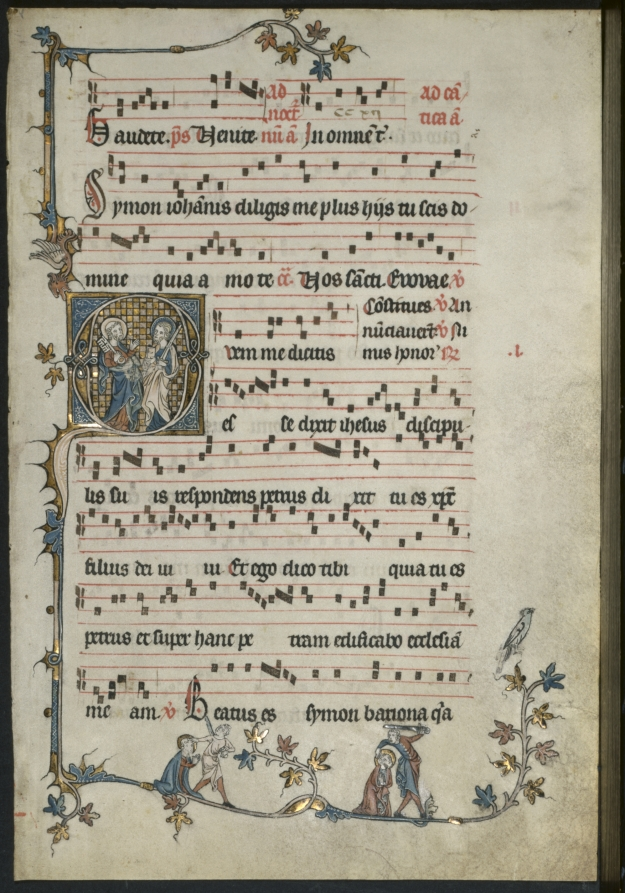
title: Leaf Excised from an Antiphonary: Initial Q with Saints Peter and Paul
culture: South Flanders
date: c. 1325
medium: ink, tempera and gold on vellum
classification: Manuscript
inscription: Quem me [esse] dicitis dixit Ihesus discipulis suis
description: The sheet belonged to an antiphonary, a large liturgical book used by the choir for chanting. It contains all the music and texts needed for daily services in the church. In South Flanders, where this manuscript originates, the Confrérie des Charitables de Saint-Éloi has been active since 1188, when a plague wave raged in the region. This brotherhood was in charge of giving bread to the poor, caring for the sick, consoling the dying, burying the dead, and giving them a burial.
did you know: This leaf comes from a manuscript once owned by the famous Victorian art critic John Ruskin (1819–1900), who removed some of its leaves to give away as gifts.